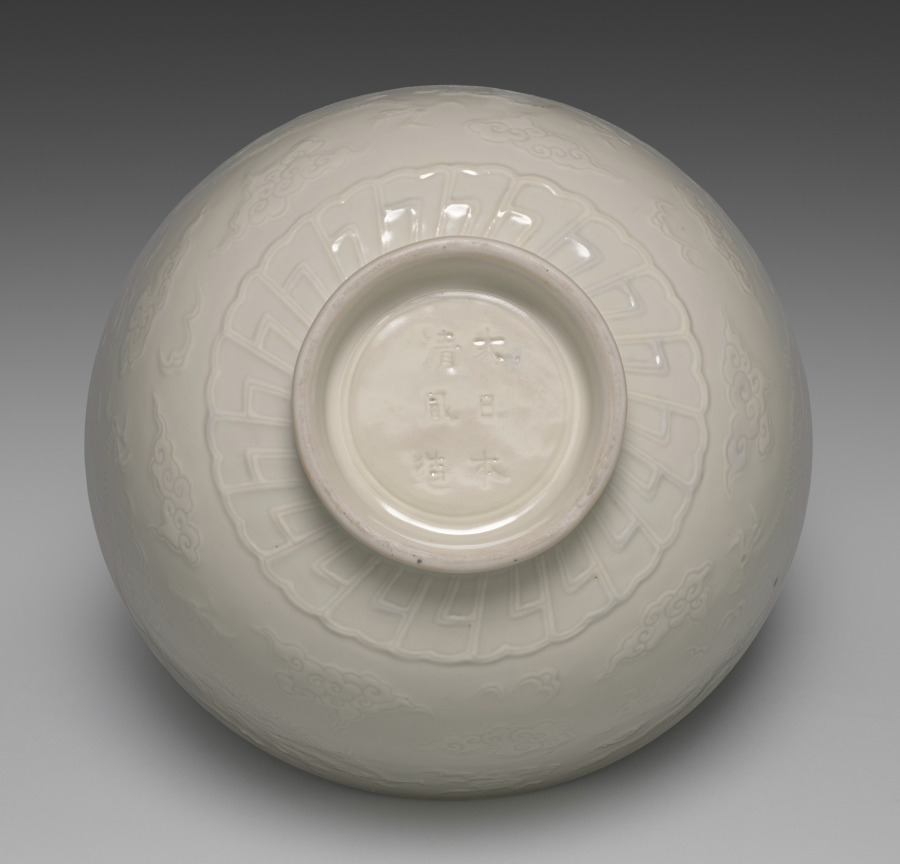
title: Bowl with Dragons Chasing Flaming Jewels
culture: Japan, Meiji period (1868–1912) to Taishō period (1912–26)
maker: Seifū Yohei III (Japanese, 1851–1914)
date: 1893–97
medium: Porcelain with molded and carved design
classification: Ceramic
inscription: 大日本清風造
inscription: 清風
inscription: 清風與平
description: The decoration of this large bowl, described as a donburi on one side of its box, is executed entirely in molded and carved relief under a creamy, pink-tinged translucent glaze. The main motif is a pair of four-clawed dragons pursuing flaming jewels. As is standard for this design, the beasts are surrounded by wisps of cloud, and a foliate pattern runs around the bottom of the basin. A geometric pattern circles the exterior of the footring. The white-on-white design makes the bowl subtle and elegant.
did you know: Kyoto-based Japanese ceramist Seifū Yohei III (1851–1914) admired the glaze colors found on Chinese porcelain and tried to replicate them through intensive experimentation.